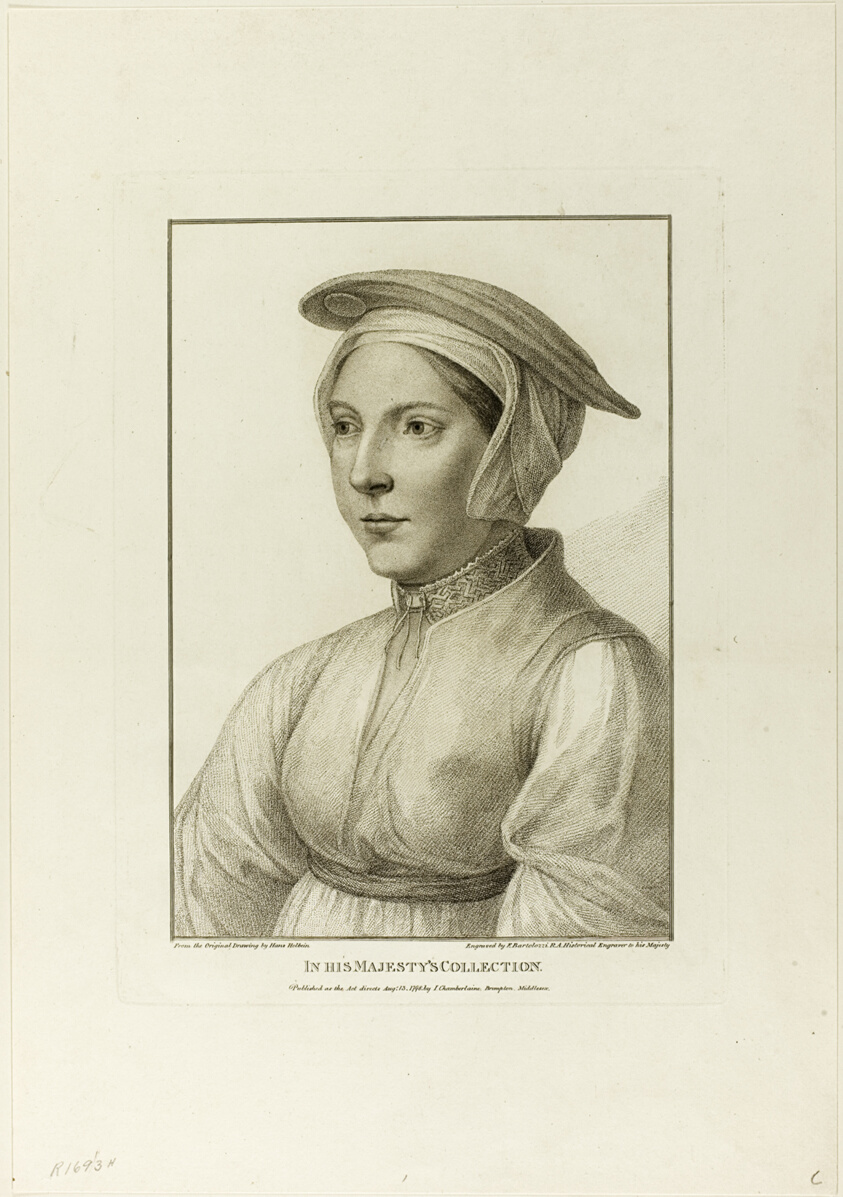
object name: Print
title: Portrait of a Young Woman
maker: Francesco Bartolozzi (Italian, 1727-1815); after Hans Holbein the younger (German, 1497-1543)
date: August 13, 1798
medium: Stipple engraving on cream wove paper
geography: Italy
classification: engraving; print; prints and drawing